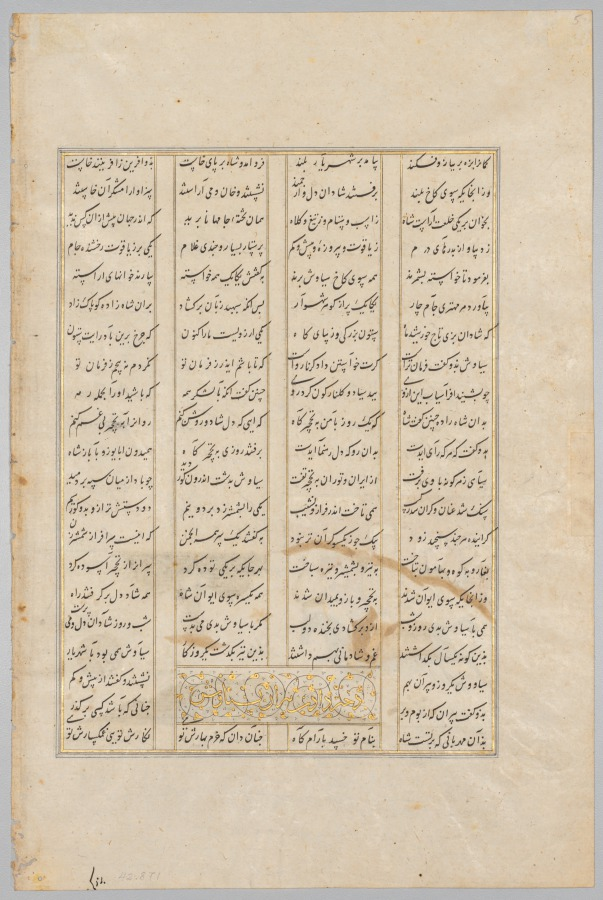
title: Persian verses (verso) from a Shahnama (Book of Kings) of Firdausi (940-1019 or 1025)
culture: Iran, Shiraz, Timurid period (1370-1501)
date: late 1400s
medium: opaque watercolor, ink, and gold on paper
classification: Manuscript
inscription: script: Nasta'liq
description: A prince from Iran’s early legendary history, Siyavush was sent by his father, the shah, to train under the great warrior Rustam in the arts of hunting, archery, and horseback riding. In the painting on the other side of this page, Siyavush demonstrates his considerable skill by hitting the bulls eye on a rolling target from horseback. The gold sky, pastel ground with grassy tufts, and dense leafy riverbank are distinctive features of Persian painting during this period.